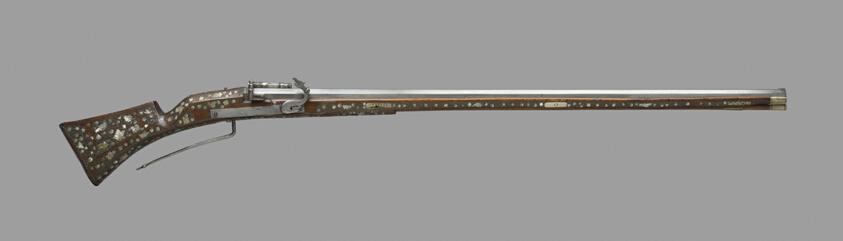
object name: Arms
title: Matchlock Musket for Target Shooting for the Court of Christian II, Elector of Saxony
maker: Probably Dutch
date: 1600–10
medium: Steel, brass, walnut, staghorn, and mother-of-pearl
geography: Netherlands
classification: firearm-long gun; arms; arms and armor